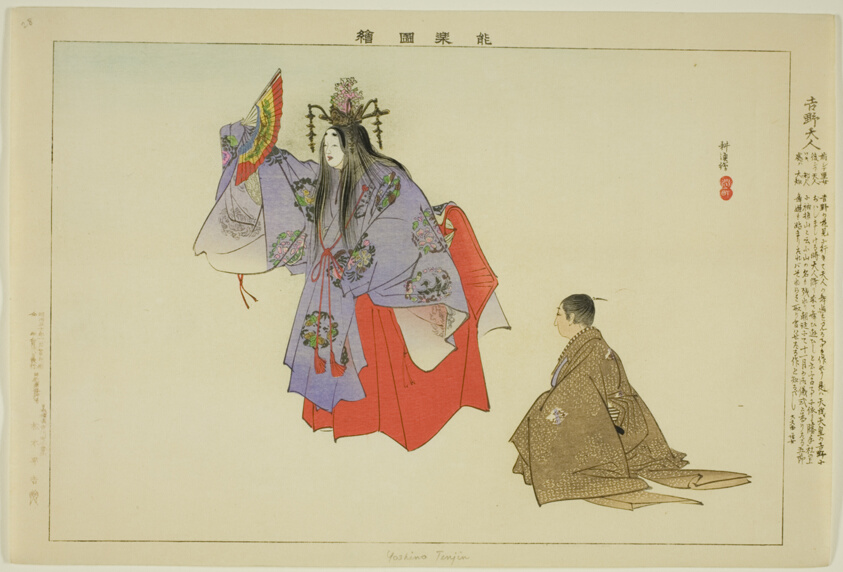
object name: Print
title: Yoshino Tennin, from the series "Pictures of No Performances (Nogaku Zue)"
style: Japanese (culture or style)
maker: Tsukioka Kogyo; Japanese, 1869-1927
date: 1898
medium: Color woodblock print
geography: Japan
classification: woodblock print; print; asian art